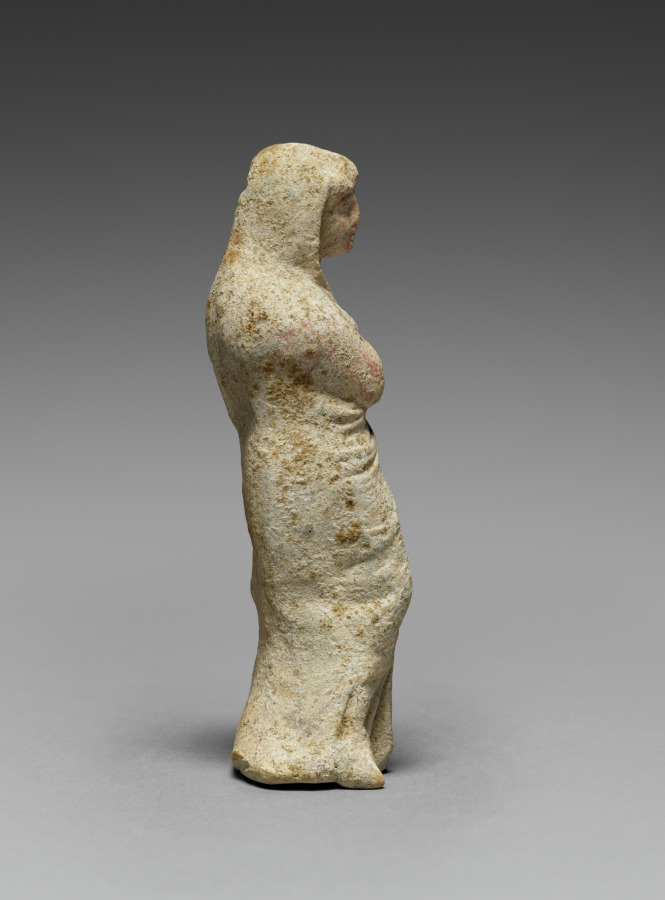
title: Figurine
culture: South Italy, Tarentum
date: 300–100 BCE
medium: terracotta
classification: Sculpture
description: Terracotta figurines like this one were popular throughout the ancient Mediterranean. This statuette takes the shape of a woman wearing a cloak or himation that twists around her form as she pulls it toward her left shoulder. Pigment is preserved in patches of red on the fabric over her arm. The figurine is mold-made, but only the front of the figure is modeled.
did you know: In ancient Greek art and literature, veiling the head or face was often a sign of αίδως (aidos), modesty or shame.